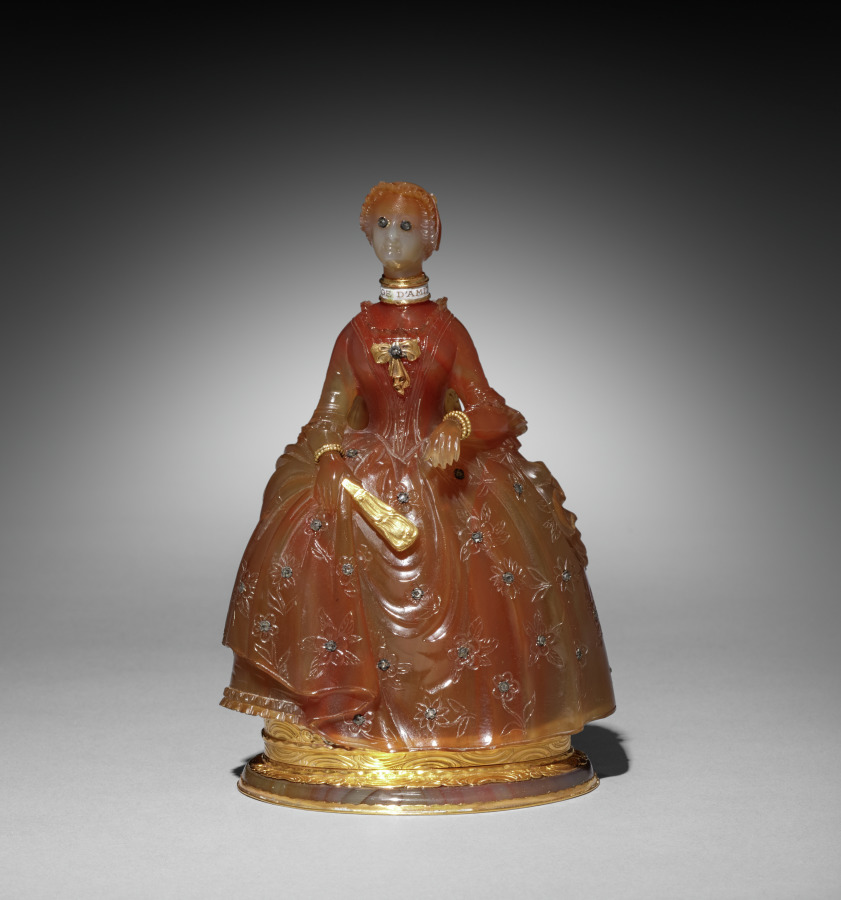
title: Scent Bottle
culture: England, 18th century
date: c. 1770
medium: chalcedony mounted in gold decorated with diamonds and enamel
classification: Miscellaneous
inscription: on neck collar: Gage d'amitie.